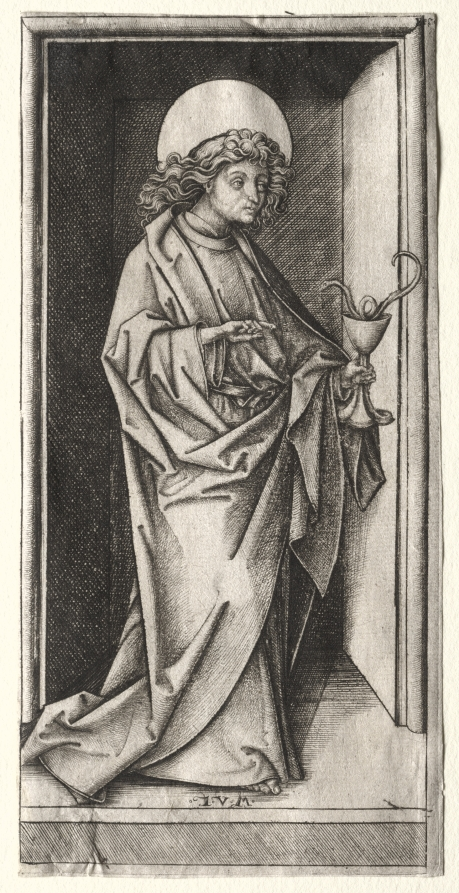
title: St. John with Serpent in Chalice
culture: Germany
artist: Israhel van Meckenem (German, c. 1440–1503)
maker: after Hans Holbein (German, c. 1465–1524)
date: c. 1480–1500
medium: engraving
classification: Print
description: According to legend, John the Evangelist was given a cup of poisoned wine that he drank without harm. As emblems of the tale, John’s chalice symbolizes the Christian faith prevailing over death, signified by the serpent. As a print, Meckenem's representation of Saint John like a sculpture in an architectural niche made it possible for more people to personally own a religious image that they might otherwise only have seen at a church.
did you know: Saint John was an especially popular saint throughout the Middle Ages and into the early modern era because his devotion to Christ set an example for all good Christians.